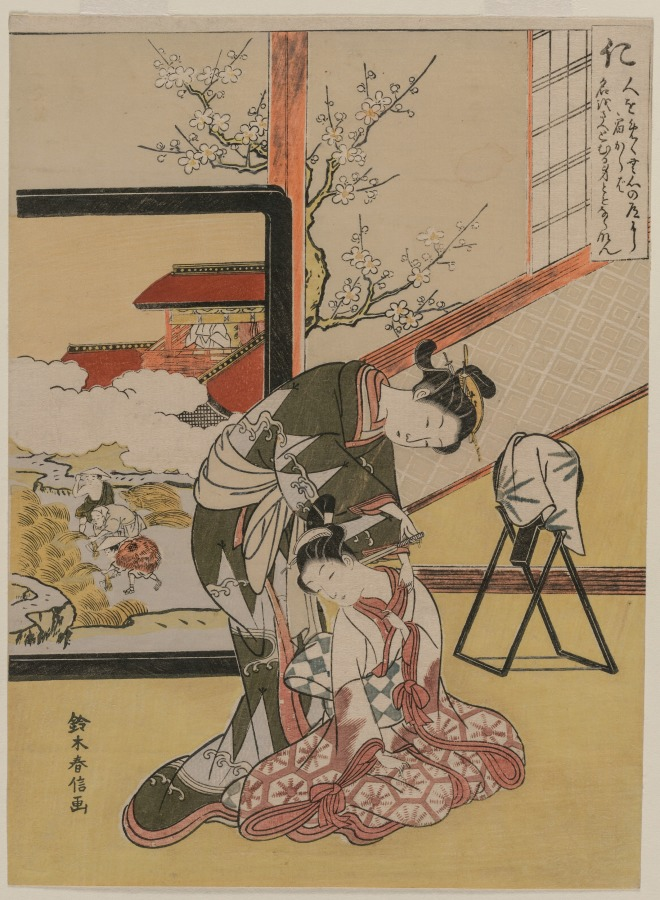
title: Benevolence, from The Five Virtues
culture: Japan, Edo period (1615–1868)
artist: Suzuki Harunobu (Japanese, 1724–1770)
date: 1767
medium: color woodblock print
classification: Print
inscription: Signature: Suzuki Harunobu ga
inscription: If you would dwell on the path of the heart,/ that is kind to others,/ then must you not also be someone,/ who suppresses even her own name?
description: This print belongs to a series of five depicting the cardinal virtues of Confucianism. In this image, a courtesan demonstrates benevolence by shaving her attendant’s neck. The other virtues are righteousness, decorum, knowledge, and fidelity. A poem at the top reads as follows: "If you would dwell on the path of the heart, / that is kind to others, / then must you not also be someone, / who suppresses even her own name?"